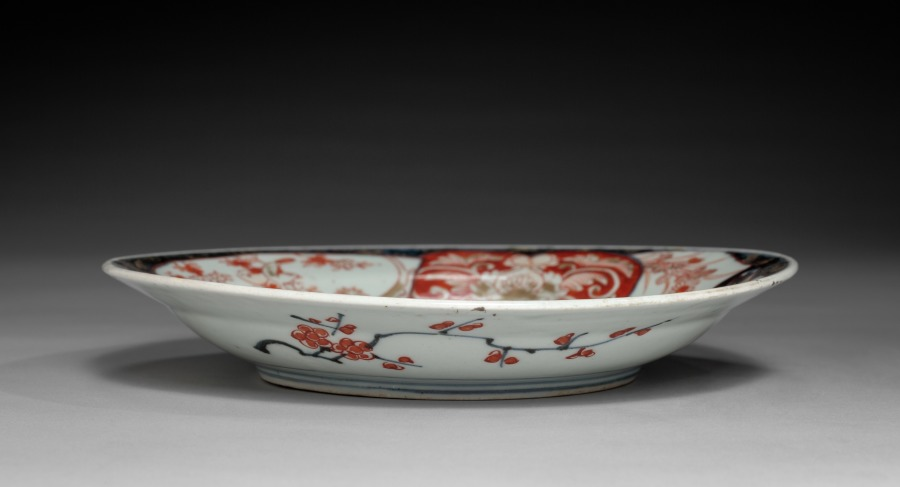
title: Plate with Vase of Peonies: Imari Ware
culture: Japan, Edo period (1615–1868)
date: c. 1700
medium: porcelain with decoration in underglaze blue overglaze, and gold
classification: Ceramic